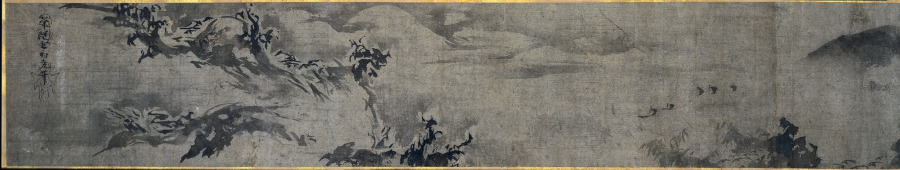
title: Eight Views of Xiao-Xiang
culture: Japan, Muromachi period (1392–1573)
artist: Sesson Shūkei (Japanese, c. 1492–c. 1577)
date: 1500s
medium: handscroll; ink on paper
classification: Painting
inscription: Signature and seal of artist at end of painting.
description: Eight Views of the Xiao and Xiang Rivers can be traced to 11th-century Chinese poems and paintings, the depiction of which had also become popular among Korean and Japanese painters. Xiao-Xiang refers to the region in present-day Hunan province where the Xiao and Xiang rivers converge. Few painters of the Eight Views had in fact seen the scenery; rather, they were trying to portray in ink and wash the lyrical qualities of dim light and a misty atmosphere typical of that region. Each of the poetic titles suggests a time of day, a season, or specific atmospheric conditions—subjects that challenged the abilities of the most talented artists. In this miniature painting (shukuzu) of the Muromachi period, Japanese Zen monk and painter Shukei Sesson depicted all eight views featured in Chinese prototypes: Wild Geese Descending to Sandbar; Returning Sails Off a Distant Coast; Mountain Market in Clearing Mist; River and Sky in Evening Snow; Autumn Moon over Dongting Lake; Night Rain on the Xiao and Xiang; Evening Bell from Mist-Shrouded Temple; and Fishing Village in Evening Glow.